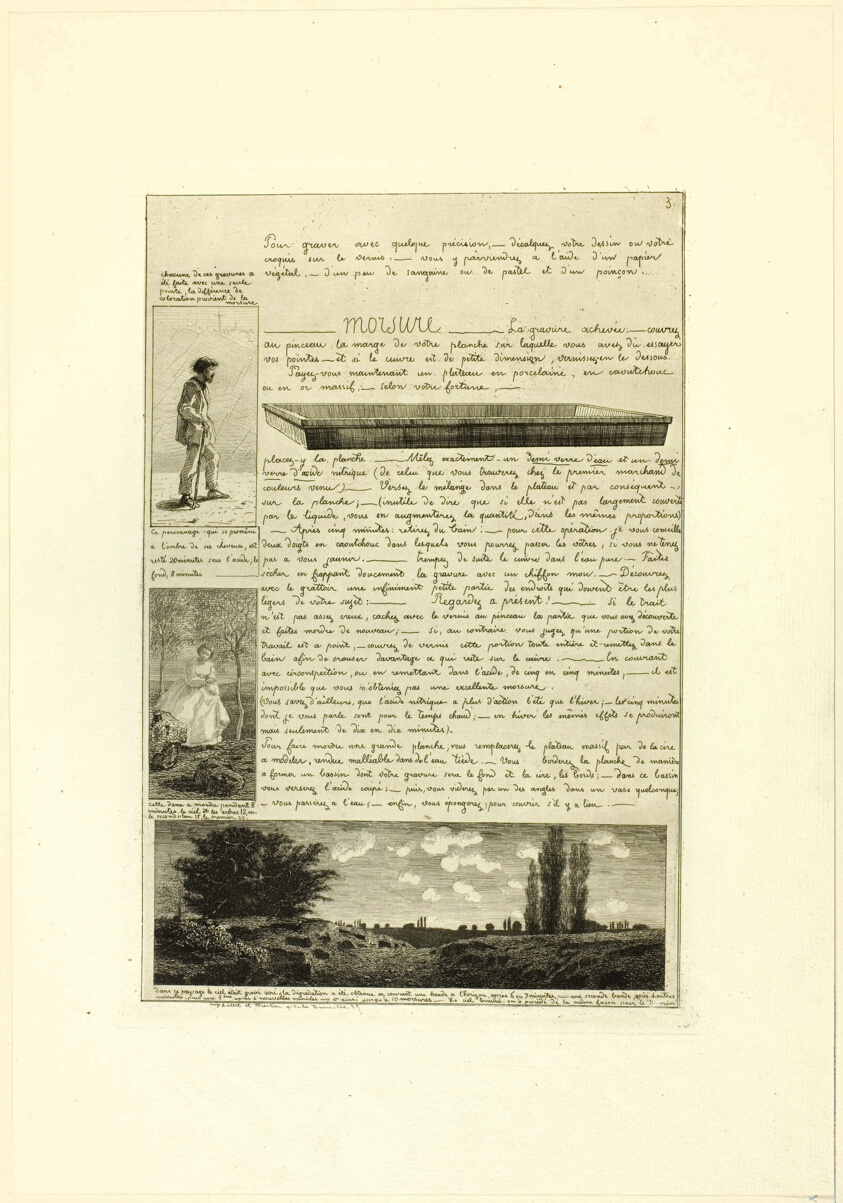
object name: Print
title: Page Three, from Letter on the Elements of Etching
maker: Adolphe Martial Potémont (French, 1828-1883); published by Editeurs Cadart & Luquet (French, 19th century); printed by Imprimerie Bullet et Forestier (French, active 19th century)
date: 1864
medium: Etching on ivory laid China paper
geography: France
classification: etching; print; prints and drawing